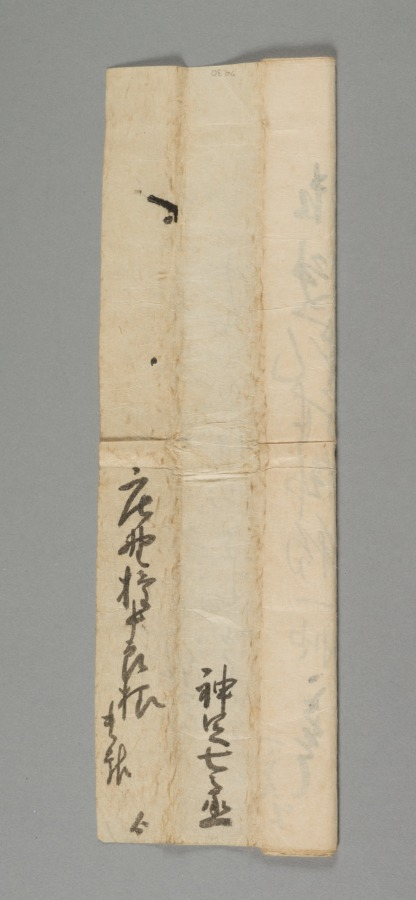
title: Crow on a Pomegranate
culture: Japan, Muromachi period (1392–1573)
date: 1500s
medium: hanging scroll; ink on paper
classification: Painting